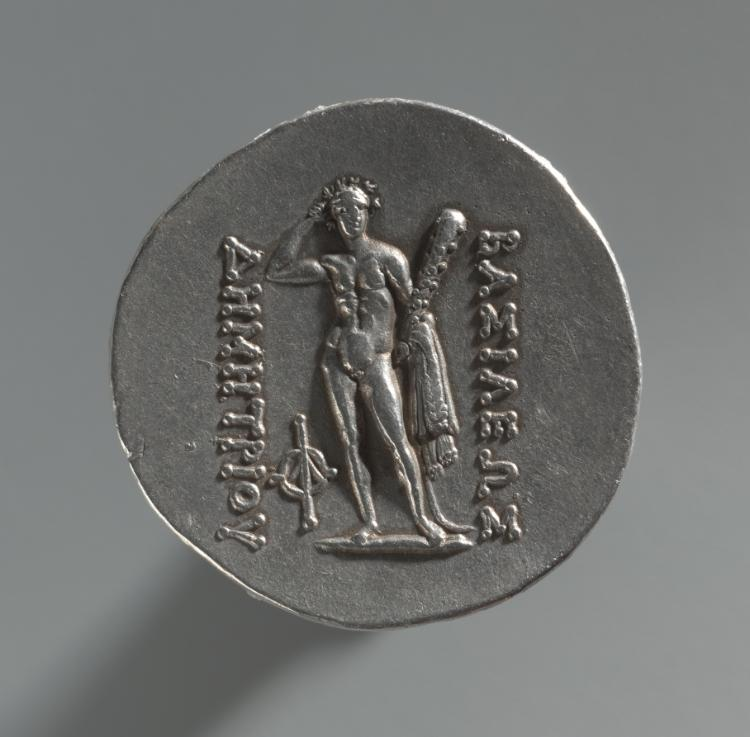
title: Tetradrachm Coin of Demetrios I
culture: Afghanistan, Bactria, Indo-Greek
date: 200–190 BCE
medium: silver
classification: Coins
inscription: BASILEOS DEMETRIOU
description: Demetrios I (222–180 BC) ruled the Indo-Greek kingdom of Bactria from 200 to 180 BC and minted this coin to commemorate his conquests over territories to the south, in present-day Pakistan. He linked his image on his coin to Alexander of Macedon (356–323 BC), who depicted himself with a lion scalp after his conquest of India; Demetrios substituted an elephant for the lion. On the reverse is Hercules, also identified with Alexander.